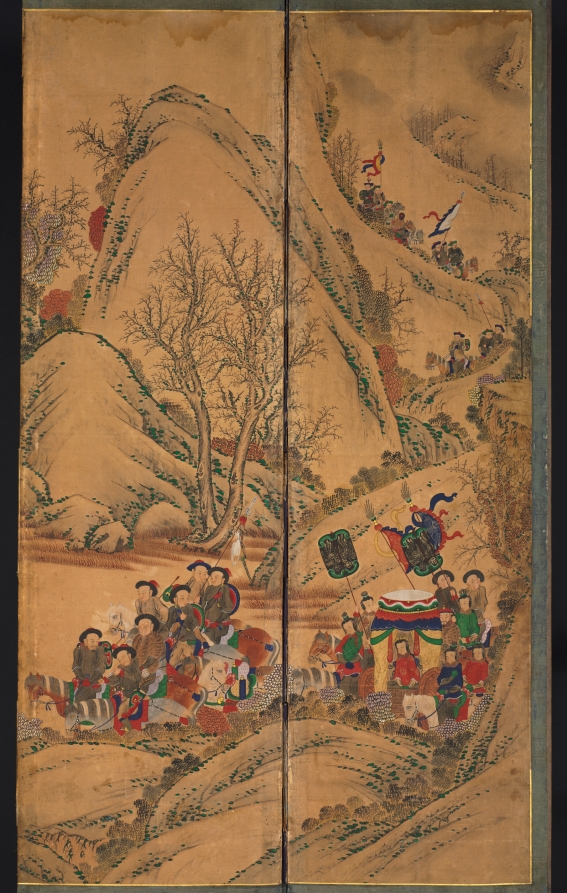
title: Hunting Scene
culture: Korea, Joseon dynasty (1392–1910)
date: 1800s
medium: eight-panel folding screen; ink and color on silk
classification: Painting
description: The theme of nomad warriors riding horses and hunting wild animals was first painted in the Qing imperial court in China in late 1600s. But it became favored by the Korean royal court and painted by the royal court painter in the late 1700s. The Joseon Korean ruling class members considered Qing nomad warriors to be "barbaric," yet highly admired their hunting and military skills. By the late 1800s, folding screens with the hunting scene were used largely for this dynamic and exotic feature.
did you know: The theme of nomad warriors hunting became highly appreciated in the Korean royal court of the 1700s for the king's particular interests in strengthening the royal army's military prowess.